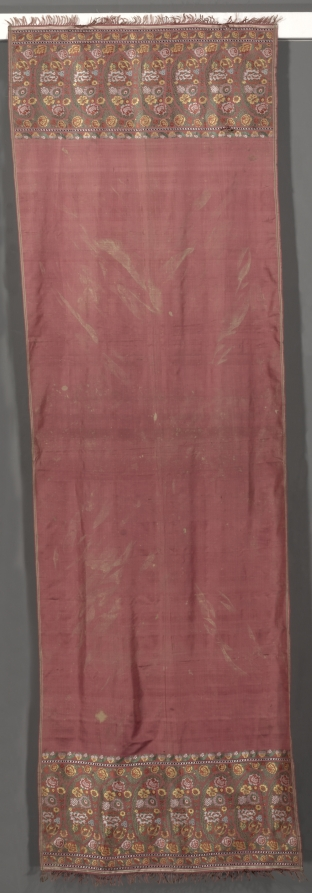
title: Long Shawl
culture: England or France, 19th century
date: 1820s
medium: Twill (Z) weave ground with supplementary weft pattern twill (S) weave; silk; wefts interlaced on back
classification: Textile